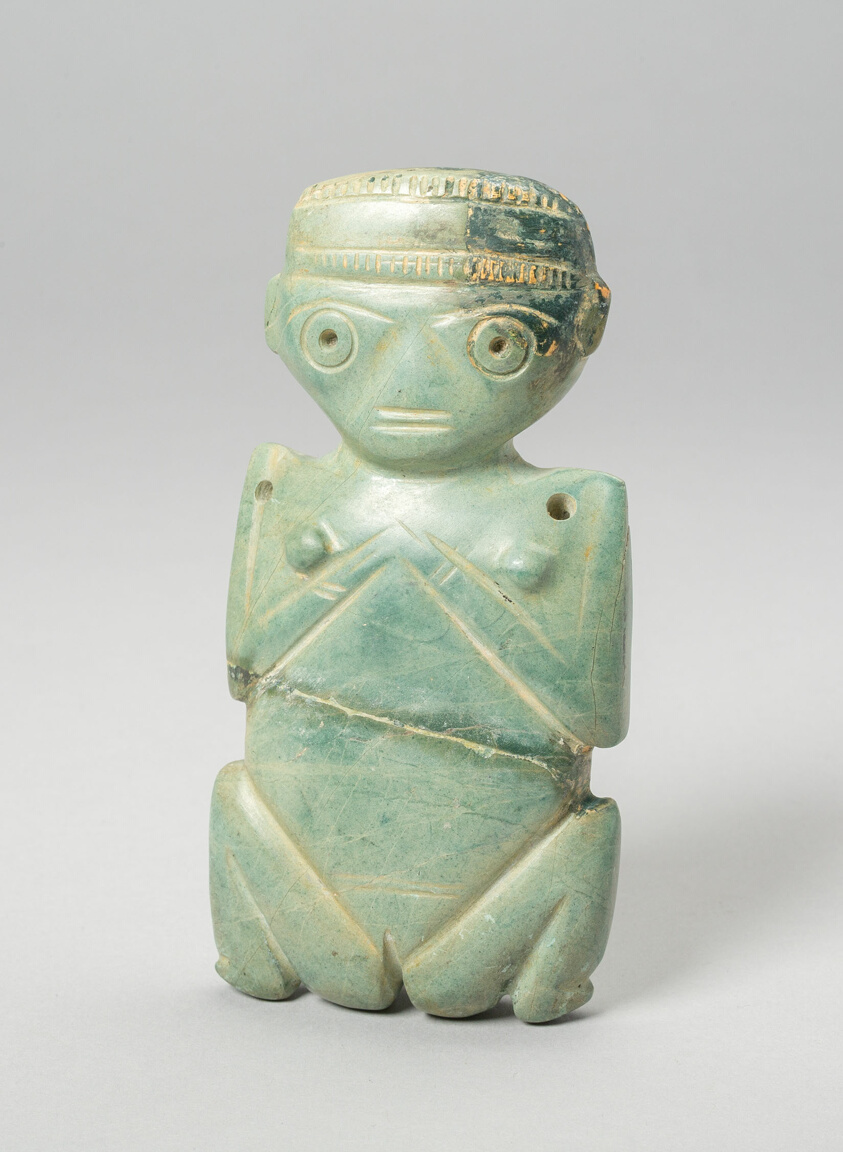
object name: Sculpture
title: Squatting Female Figurine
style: lower central america, Arts of the Americas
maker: Costa Rica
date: 100–600 CE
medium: Greenstone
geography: Costa Rica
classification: statuette; stone; jewelry; art of the americas; sculpture